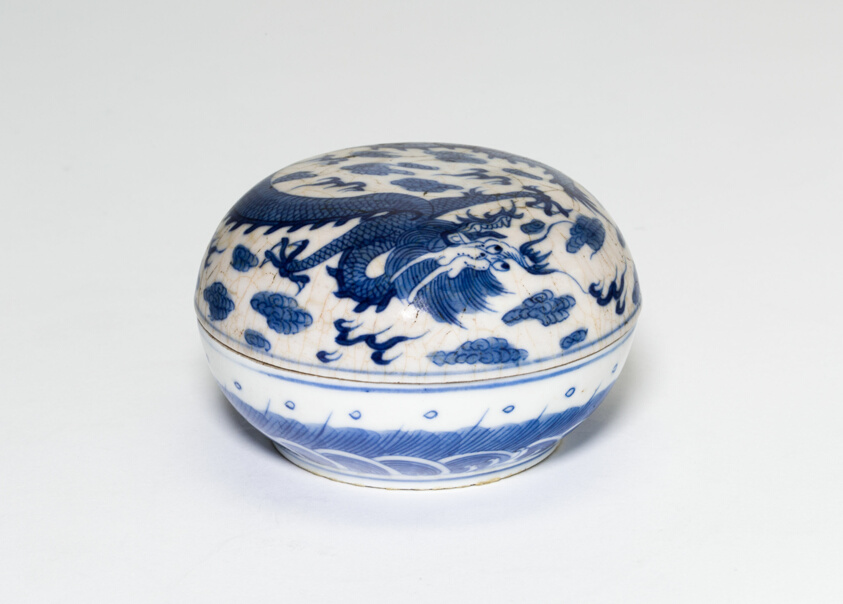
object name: Vessel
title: Covered Circular Box with a Dragon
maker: China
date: Ming dynasty (1368–1644) Chenghua reign mark and period (1464–1487)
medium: Porcelain painted in underglaze blue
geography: China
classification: porcelain; asian art; ceramics